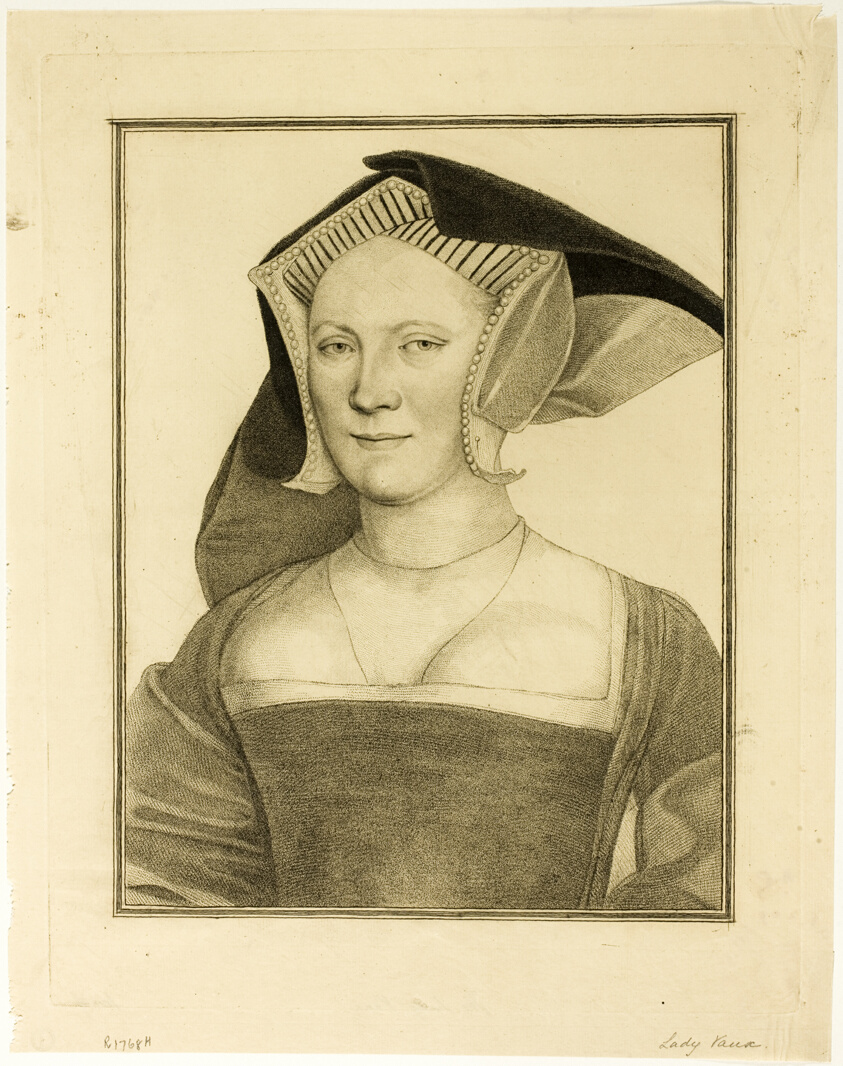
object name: Print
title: Lady Vaux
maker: Francesco Bartolozzi (Italian, 1727-1815); after Hans Holbein the younger (German, 1497-1543)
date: March 25, 1793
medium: Stipple engraving on buff laid paper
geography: Italy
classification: engraving; print; prints and drawing